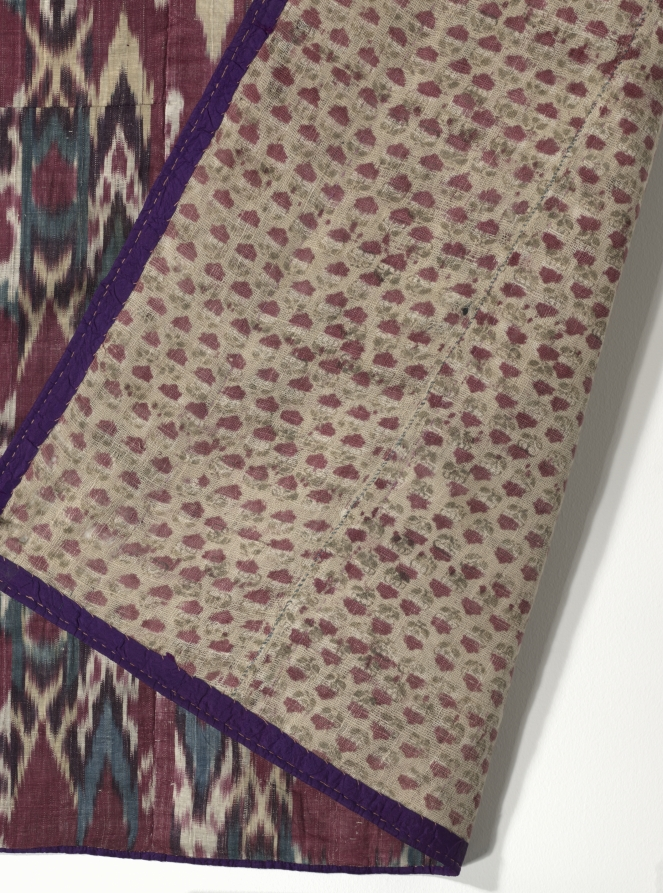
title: Wall hanging (pardah)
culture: Uzbekistan, Bukhara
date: 1800–1850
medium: warp ikat, warp-faced plain weave; silk warp, cotton weft; 5-1/2 panels/ original lining: block printed cotton, plain weave; 3 panels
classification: Textile